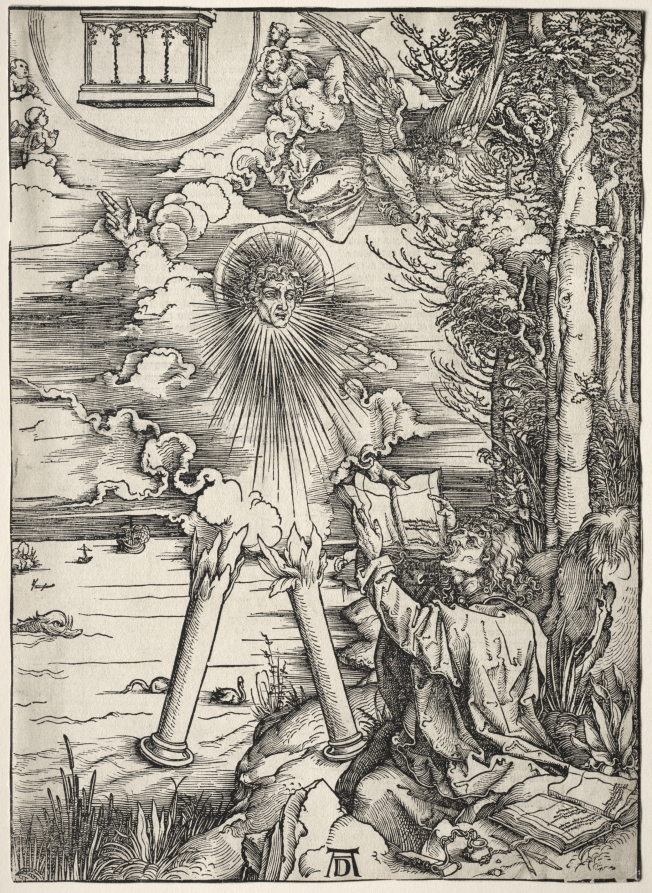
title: Revelation of St. John: St. John Devouring the Books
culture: Germany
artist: Albrecht Dürer (German, 1471–1528)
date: 1511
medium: woodcut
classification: Print